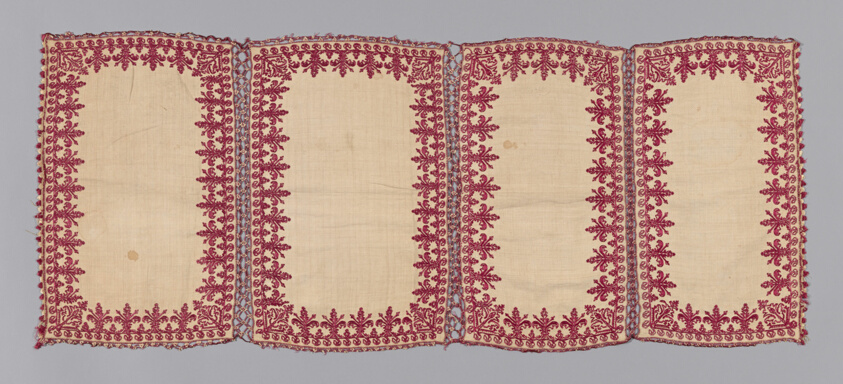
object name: Textile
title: Cover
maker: Italy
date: 1625/75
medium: Linen, plain weave; embroidered in silk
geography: Italy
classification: textile; needlework (visual works)